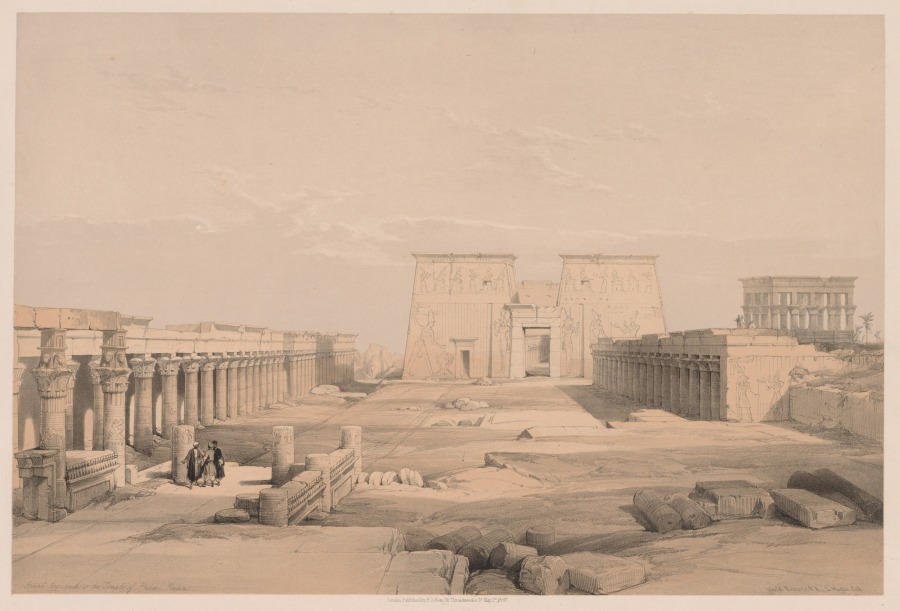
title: Egypt and Nubia: Volume I - No. 42, Grand Approach to the Temple of Philae, Nubia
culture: England, 19th century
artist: Louis Haghe (British, 1806–1885)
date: 1838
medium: color lithograph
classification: Print